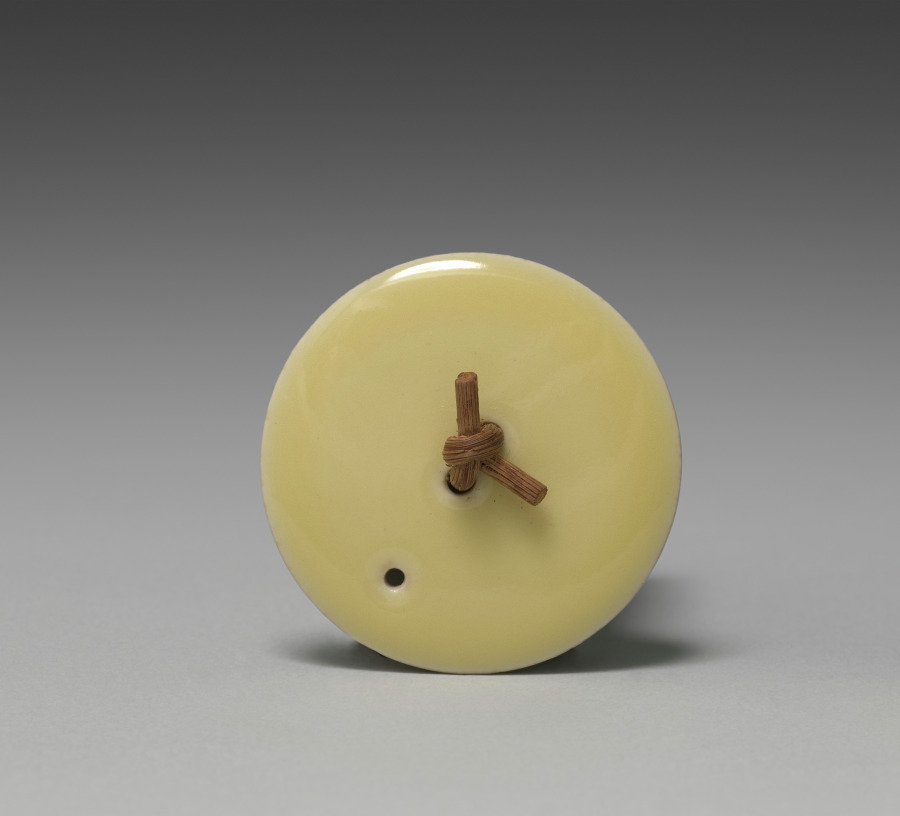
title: Lid for a Sake Pourer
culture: Japan, Taishō period (1912–26) or Shōwa period (1926–89)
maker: Seifū Yohei IV (Japanese, 1872–1951)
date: 1914–46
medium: Porcelain with yellow glaze and bamboo lid handles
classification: Ceramic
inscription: 清風造 。 【印】 清風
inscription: 成山清風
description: Like his father, Yohei IV also produced works with red or yellow monochrome glazes. His yellow-glazed works include this pair of sake pourers, a set of five drinking cups CMA 2022.217, and a sweets bowl molded into the shape of a chrysanthemum CMA 2022.218.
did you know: The lid's handle is made of bamboo.